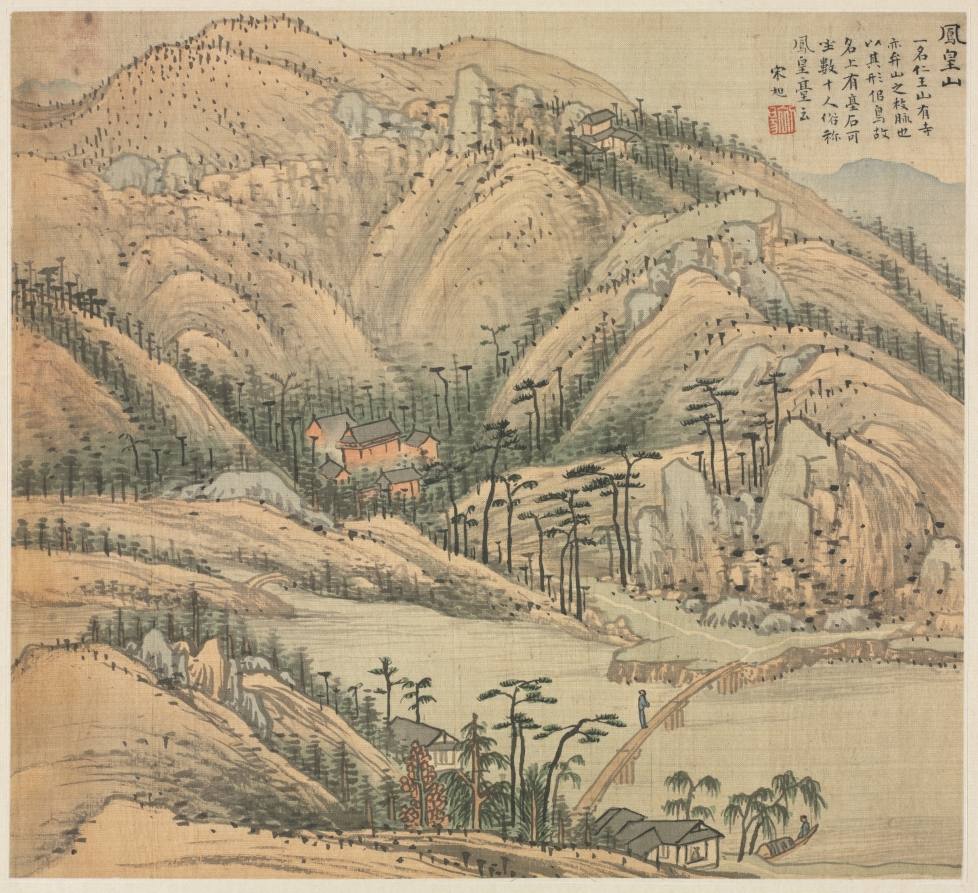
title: Mt. Fenghuang (Mt. Phoenix)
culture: China, Jiaxing, Ming dynasty (1368–1644)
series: Eighteen Views of Huzhou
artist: Song Xu (Chinese, 1525-c. 1606)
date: c. 1588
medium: Album leaf; ink and color on silk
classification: Painting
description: By the 1500s, visits to historic and scenic sites in the lower Yangzi delta stimulated an increase of printed illustrated travel books. Topographical depictions of local scenery flourished. Leaves from this album illustrates sites around Lake Tai of the two adjacent counties Changxing and Wuxing (modern Huzhou). Song Xu, who lived intermittently in Jiaxing and Songjiang, must have passed through Wuxing by boat and thus knew the region. The paintings are inscribed with gazetteerlike notations, suggesting that the album was produced for clients as commemorative works, a travel guide, or for “armchair travel” (woyou) in one’s mind.